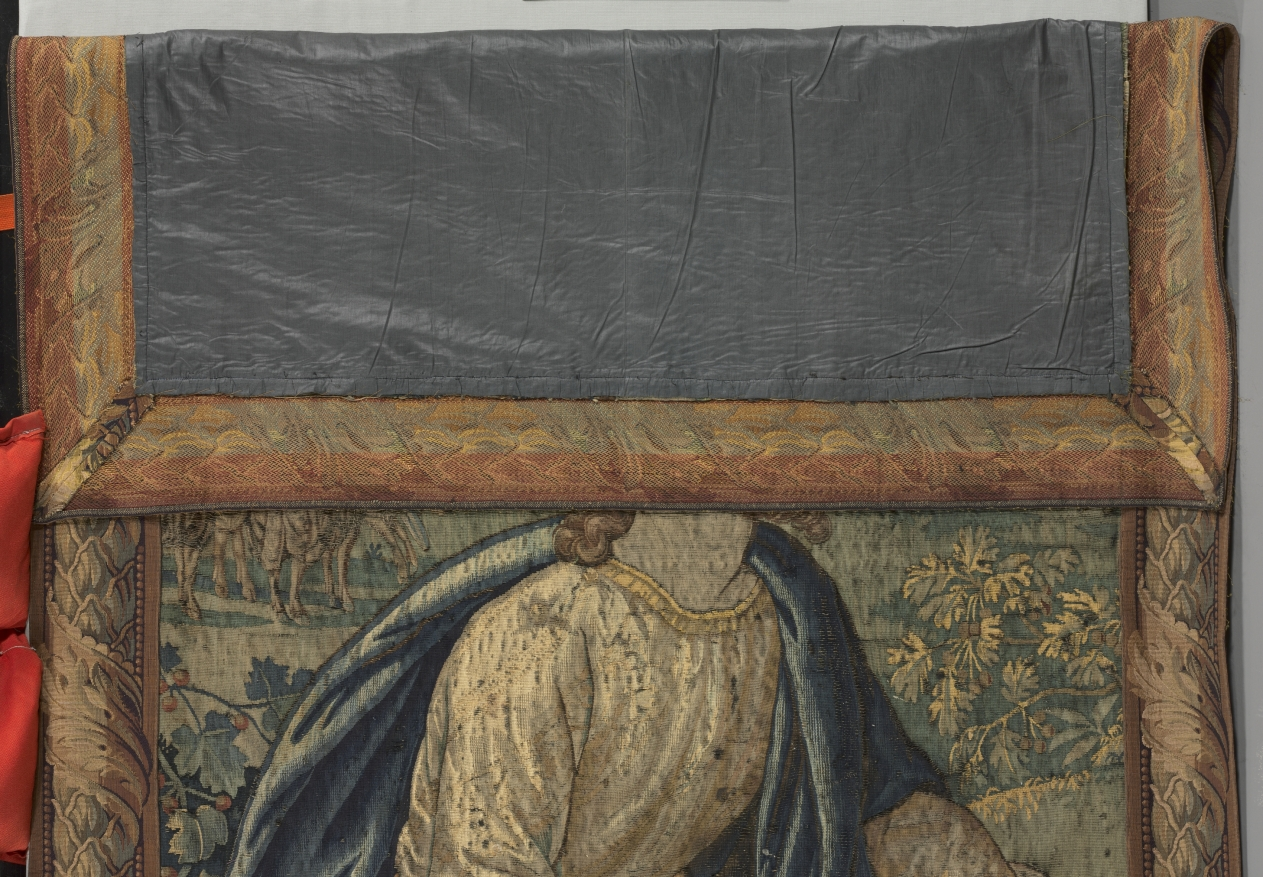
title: Moses and Jethro's Daughter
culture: Flanders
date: 1600s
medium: Wool: tapestry weave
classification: Tapestry